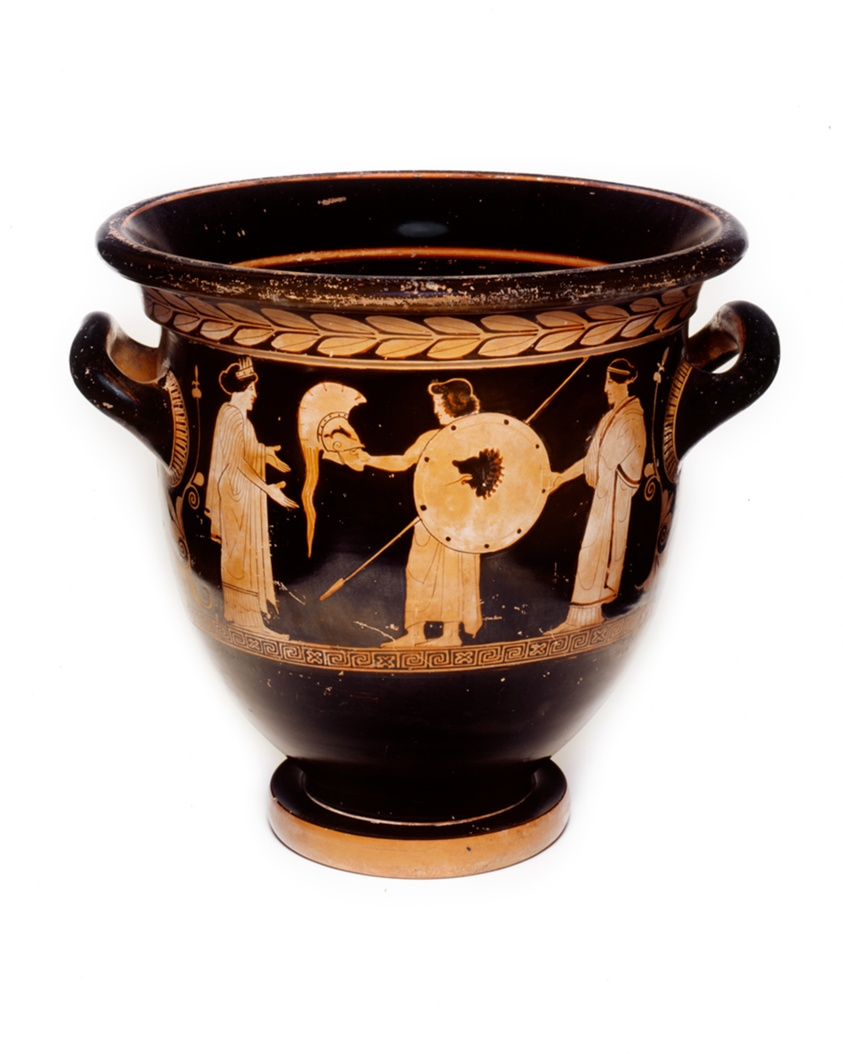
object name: Vessel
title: Bell Krater (Mixing Bowl)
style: high classical, Classical, attic, red-figure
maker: Manner of the Niobid Painter; Greek; Athens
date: about 450 BCE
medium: terracotta, red-figure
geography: Athens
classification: vessel; earthenware; ceramics; ancient art